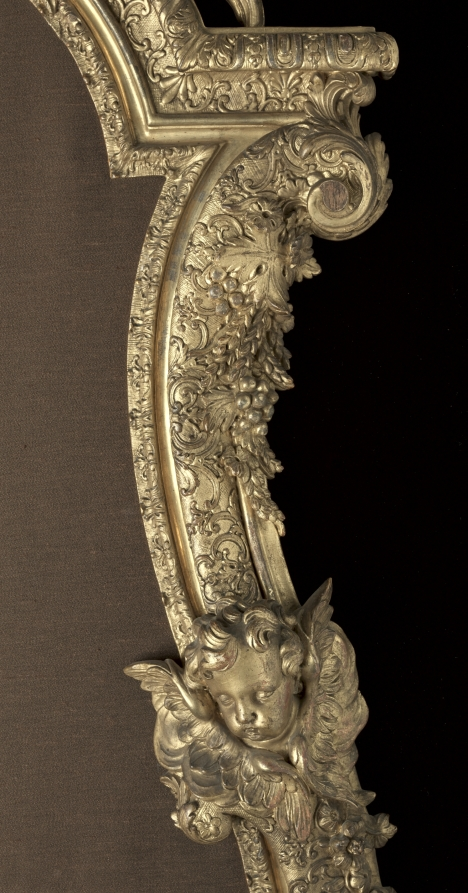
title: Frame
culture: France, early 18th Century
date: c. 1710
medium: carved and gilt wood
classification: Furniture and woodwork